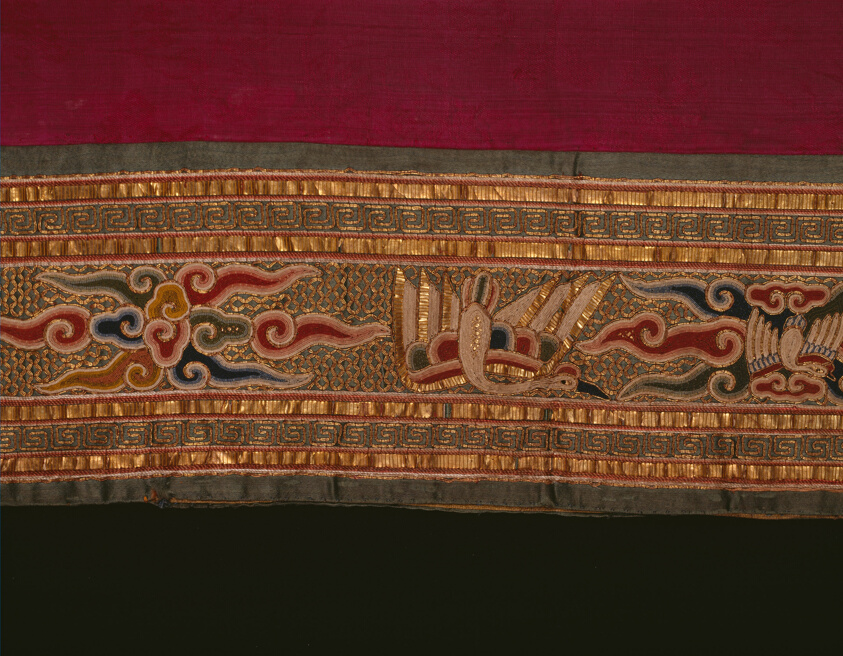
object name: Costume and Accessories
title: Vestment (For a Second-degree Taoist Priest)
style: qing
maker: Han-Chinese (China)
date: Qing dynasty (1644–1911), 1801/50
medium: Silk, warp-float faced 3:1 'S' twill weave self-patterned by areas of plain weave; edge bands and center back: silk, warp-float faced 7:1 satin weave; embroidered with silk, gold-leaf-over-lacquered paper, and gold-leaf-over-lacquered-paper-strip-wrapped silk in satin and knot stitches; laid work and couching; inner collar and closures: silk, weft-float faced 1:7 satin weave; collar patches: silk, warp-float faced 7:1 satin weave; lined with ramie, plain weave; lining fragments: silk, warp-float faced 4:1 satin weave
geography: China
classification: textile; needlework (visual works); weaving; costume